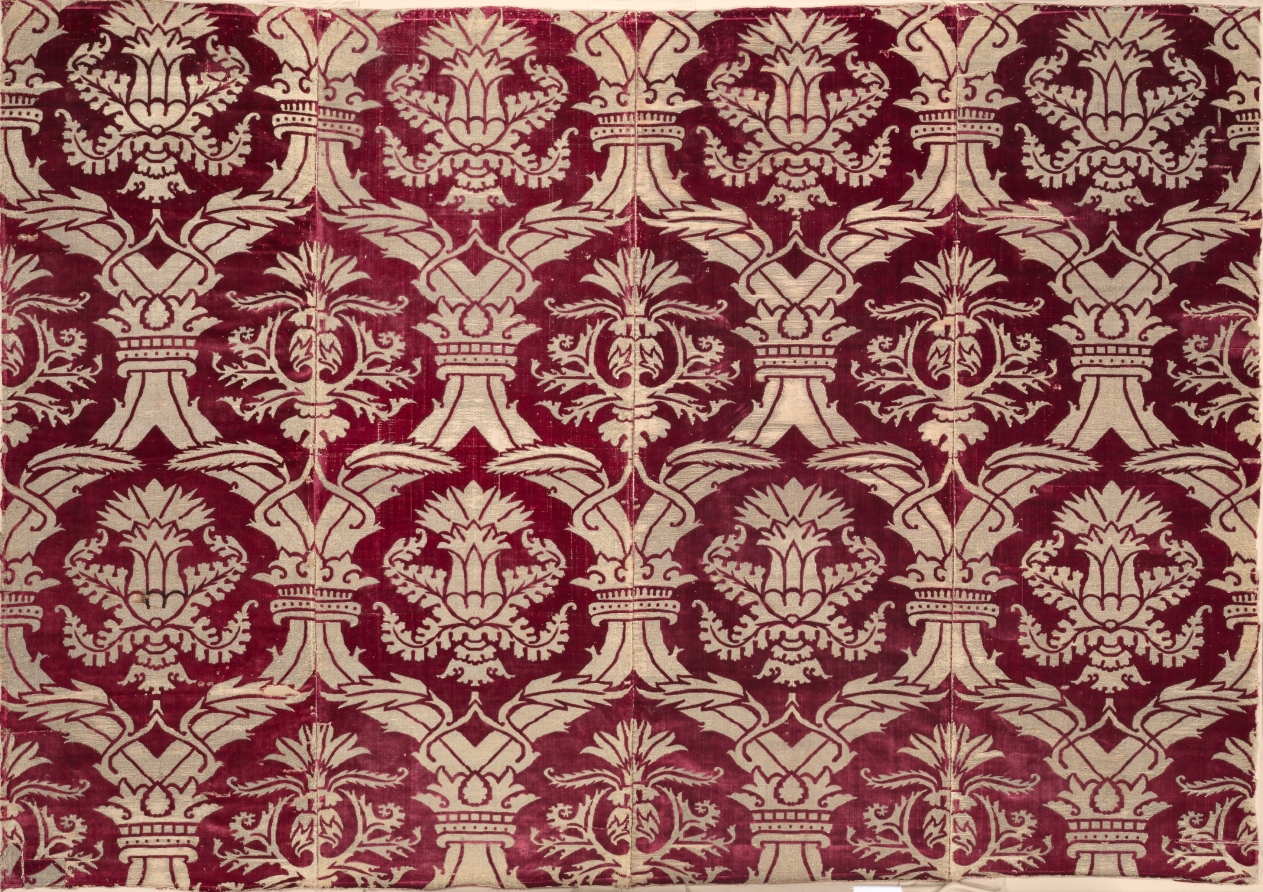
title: Brocaded Velvet Panel with Italianate Pattern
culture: Turkey, Istanbul or Bursa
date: 1575–1625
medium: Silk: velvet, brocaded; gilt-metal thread and cotton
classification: Velvet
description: Rarely are four fabric widths preserved together from any culture. This gilt-metal thread pattern combines Turkish and Italian features: the large ogival (curved) lattice clasped by crowns and the velvet structure are Turkish, and the two so-called artichoke designs are enlarged adaptations of Italian motifs. A symbol of wealth and power, this velvet panel was woven during the artistic height of the Ottoman Empire in the late 1500s. It may have covered a divan (sofa) or possibly enhanced a wall during cold winters in the imperial Topkapi Palace in Istanbul.